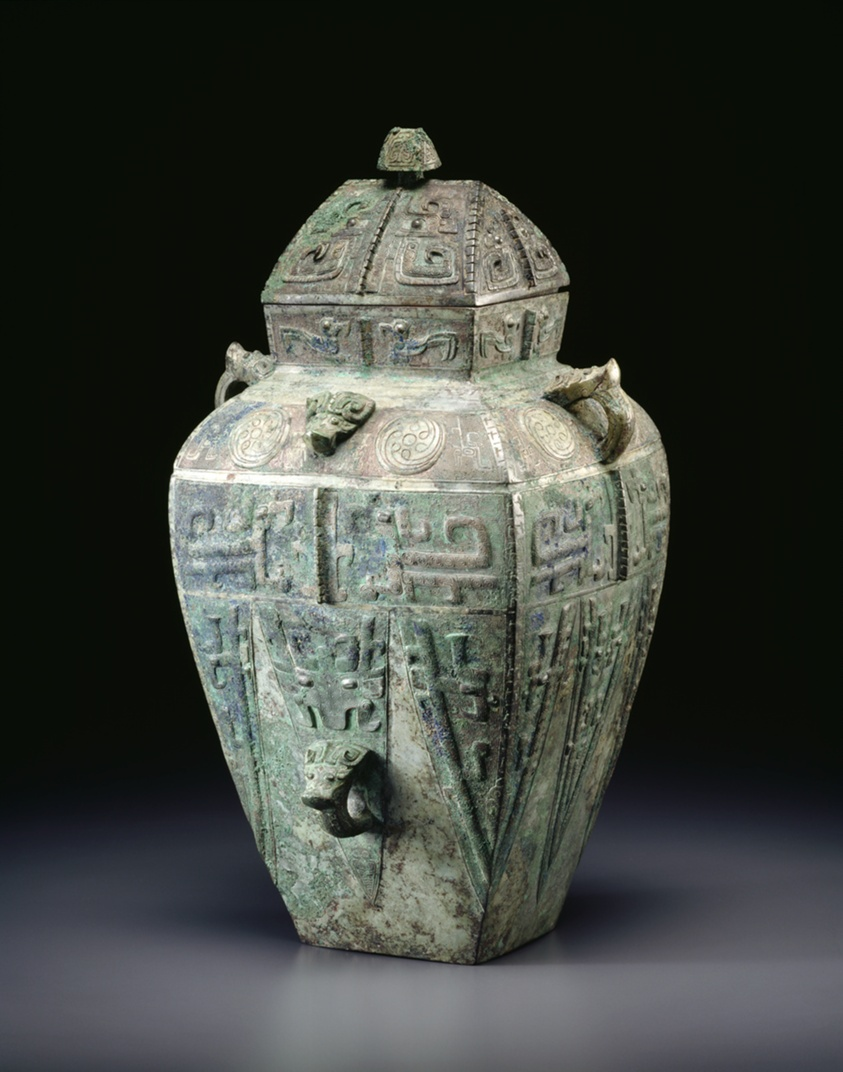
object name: Religious/Ritual Object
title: Wine Container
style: Chinese (culture or style)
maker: China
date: Shang dynasty ( About 1600–1046 BC ), 12th/11th century BC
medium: Bronze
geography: China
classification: vessel; bronze; vessel for serving drinks; metal; asian art; ritual objects